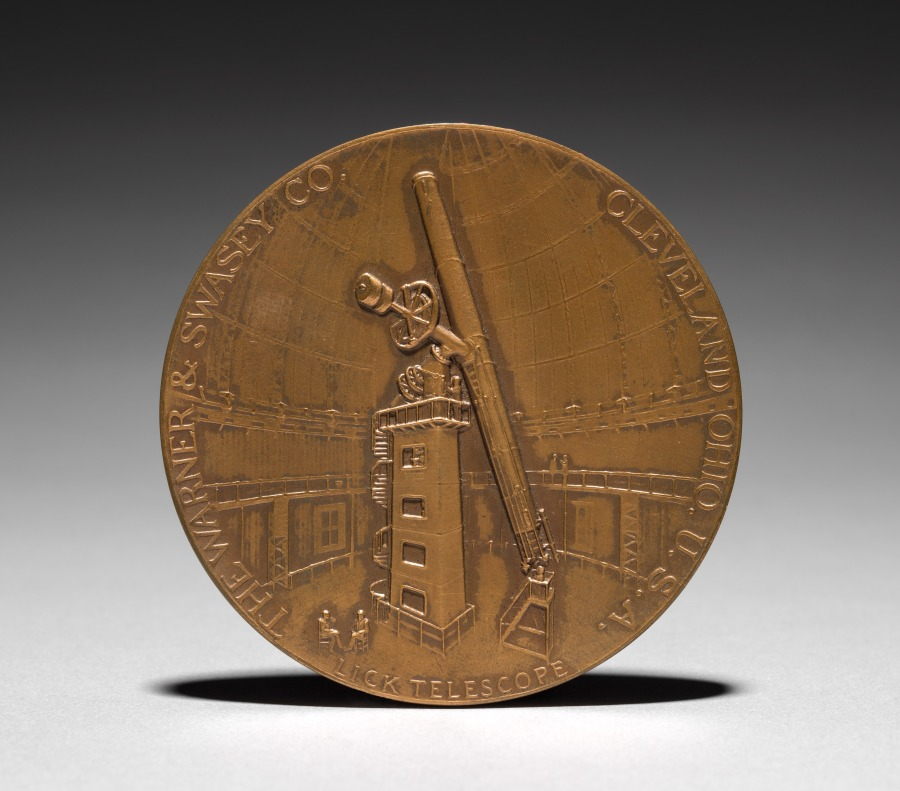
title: Medal Commemorating the 40th Anniversary of the Warner and Swasey Company (reverse)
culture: America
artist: Victor D. Brenner (American, 1871–1924)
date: 1920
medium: bronze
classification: Metalwork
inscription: "The Warner and Swasey Co., Cleveland, Ohio, U. S. A."